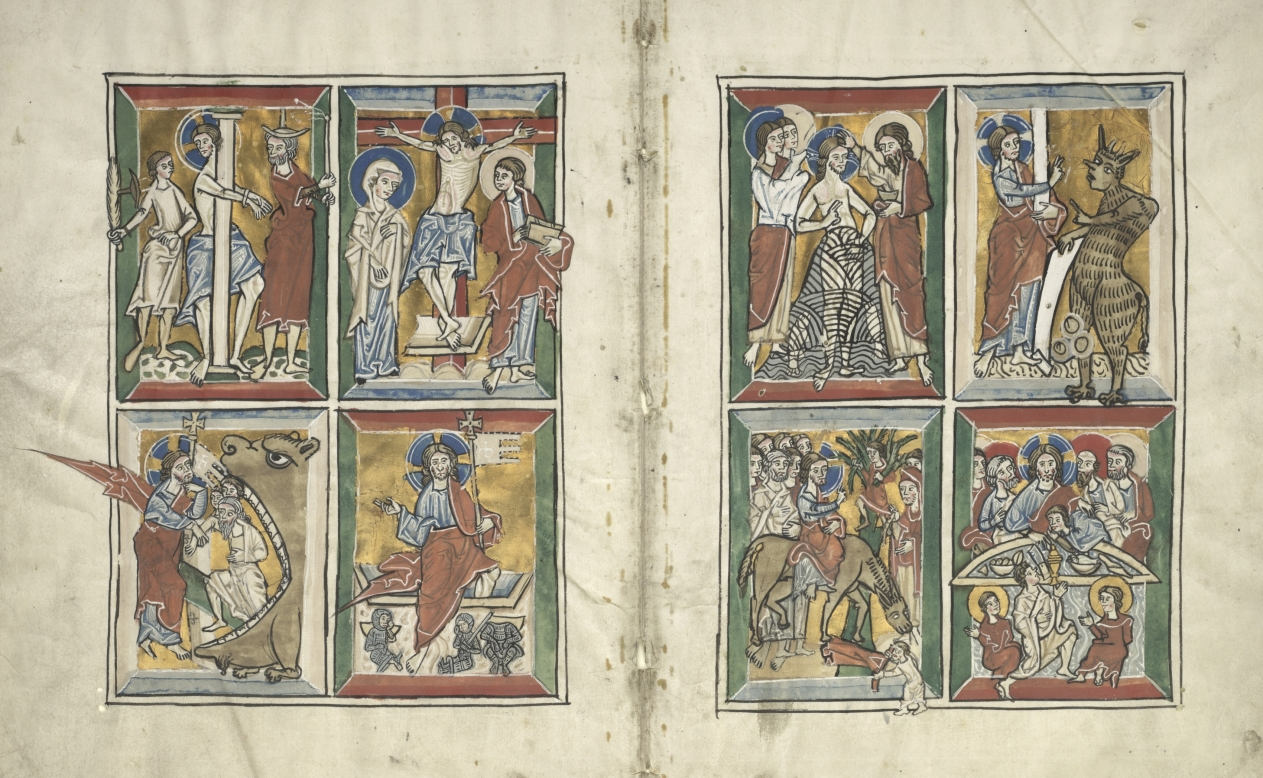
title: Bifolio with Scenes from the Life of Christ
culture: Germany, Lower Saxony (Diocese of Hildesheim), Braunschweig(?), 13th century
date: 1230–1240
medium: tempera, and gold on vellum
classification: Manuscript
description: A sheet of vellum (animal skin) folded down the center to create two leaves, or folios, is called a bifolium (plural: bifolia). This pair of bifolia originally were to have been inserted one inside the other, forming part of a large psalter, or book of the psalms. The small paintings, called miniatures, decorating each leaf are subdivided into four small panels and illustrate the life of Christ. This particular format, along with the style of decoration, tells us that the psalter was made in North Germany, in the Diocese of Hildesheim. In northern Europe, after 1050, a tradition emerged of illustrating psalters with scenes of the life of David (the author of the Psalms) and the life of Christ. This juxtaposition implied a shared ancestry, since Christ was a descendant of the House of David. In the parent volume these miniatures may have been accompanied by a David cycle.